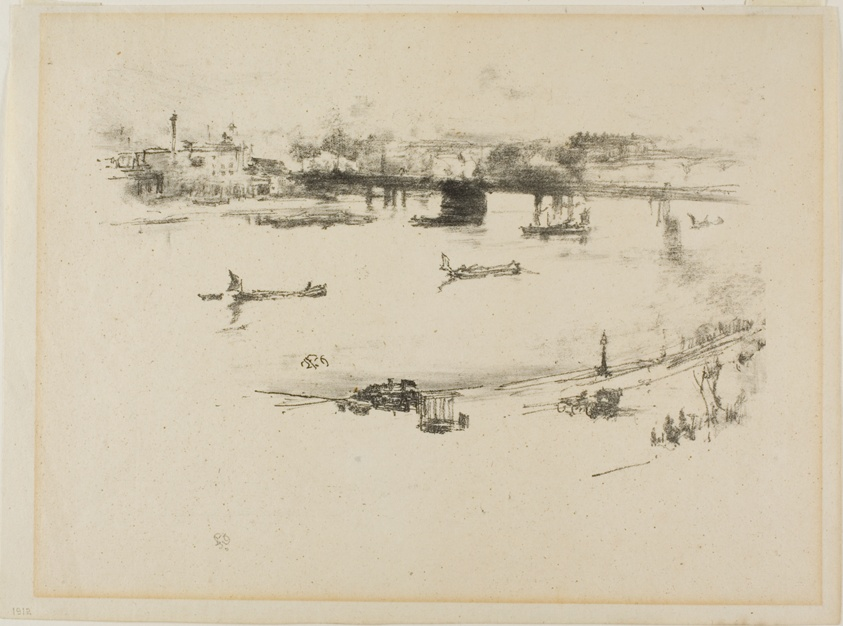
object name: Print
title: Charing Cross Railway Bridge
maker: James McNeill Whistler (American, 1834-1903)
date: 1896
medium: Transfer lithograph in black with stumping, scraping, and incising, on cream laid paper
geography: United States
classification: transfer lithograph; lithograph; print; prints and drawing; paper